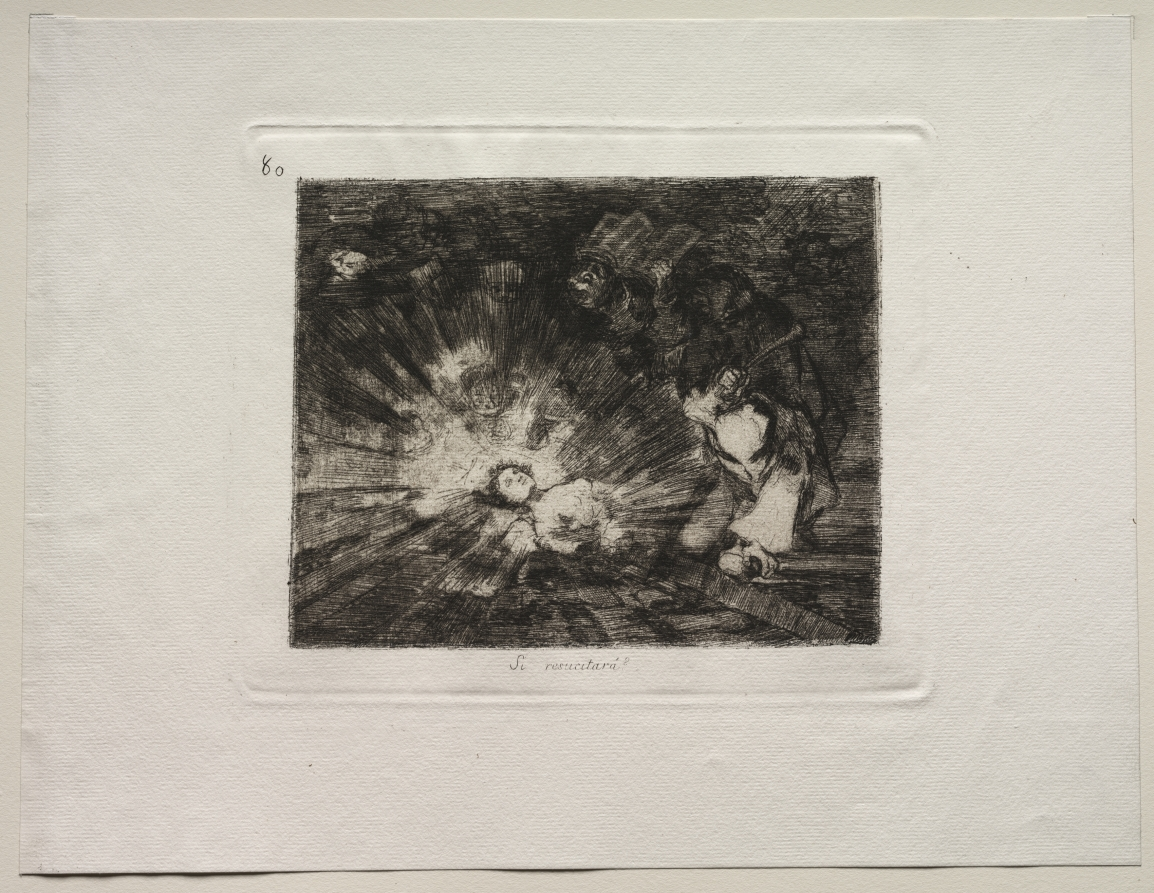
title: The Horrors of War: Will She Rise Again?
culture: Spain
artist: Francisco de Goya (Spanish, 1746–1828)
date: c. 1810–20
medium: etching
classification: Print